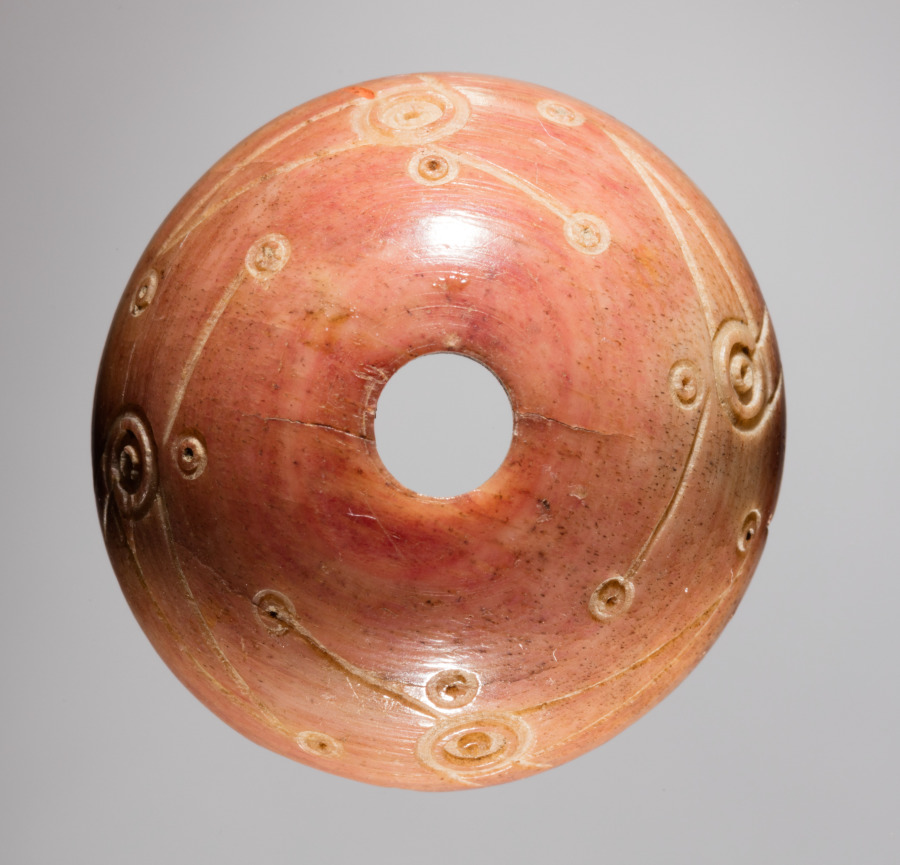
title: Spindle Whorl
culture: Iran, early Islamic period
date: 700s - 900s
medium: bone, incised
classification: Spindle Whorl